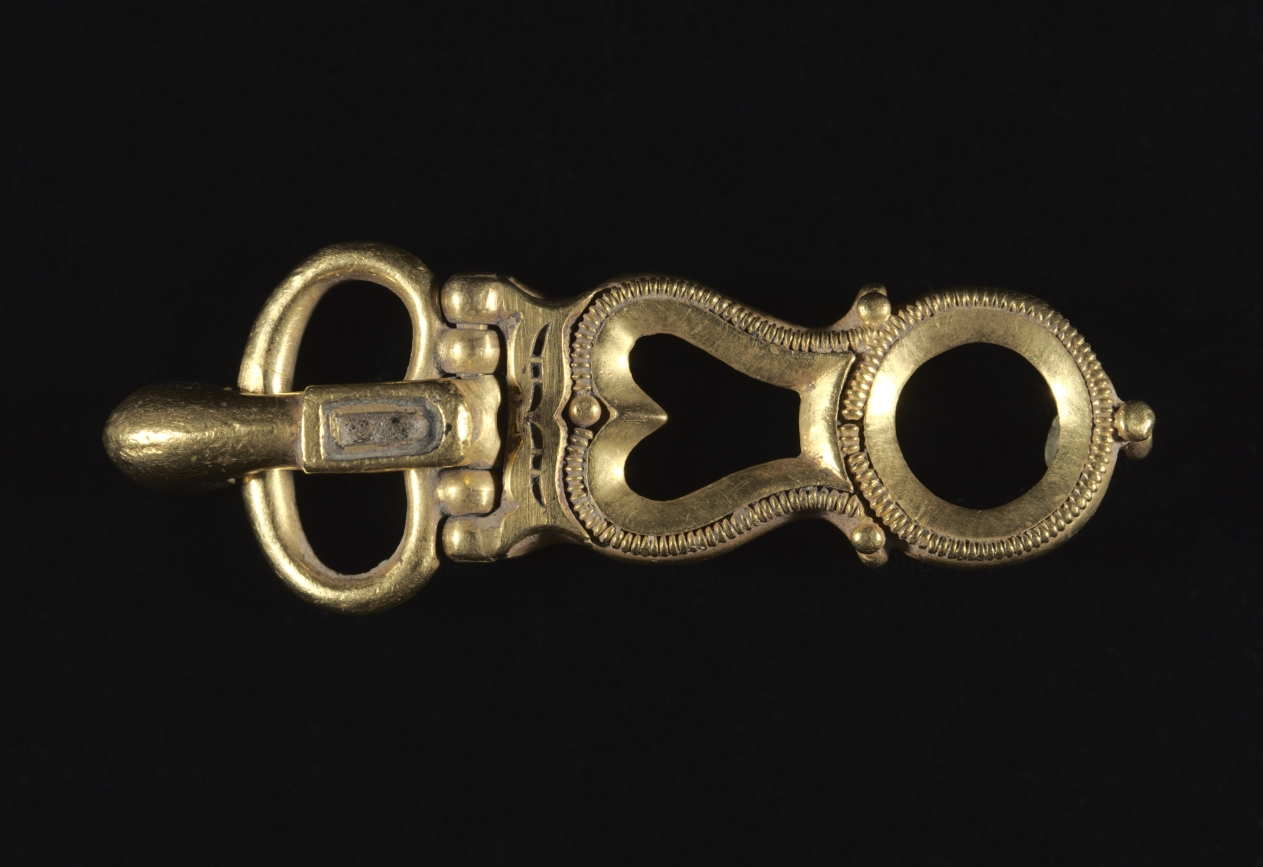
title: Buckle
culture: Byzantium, Avaric, 7th century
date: 600s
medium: gold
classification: Metalwork